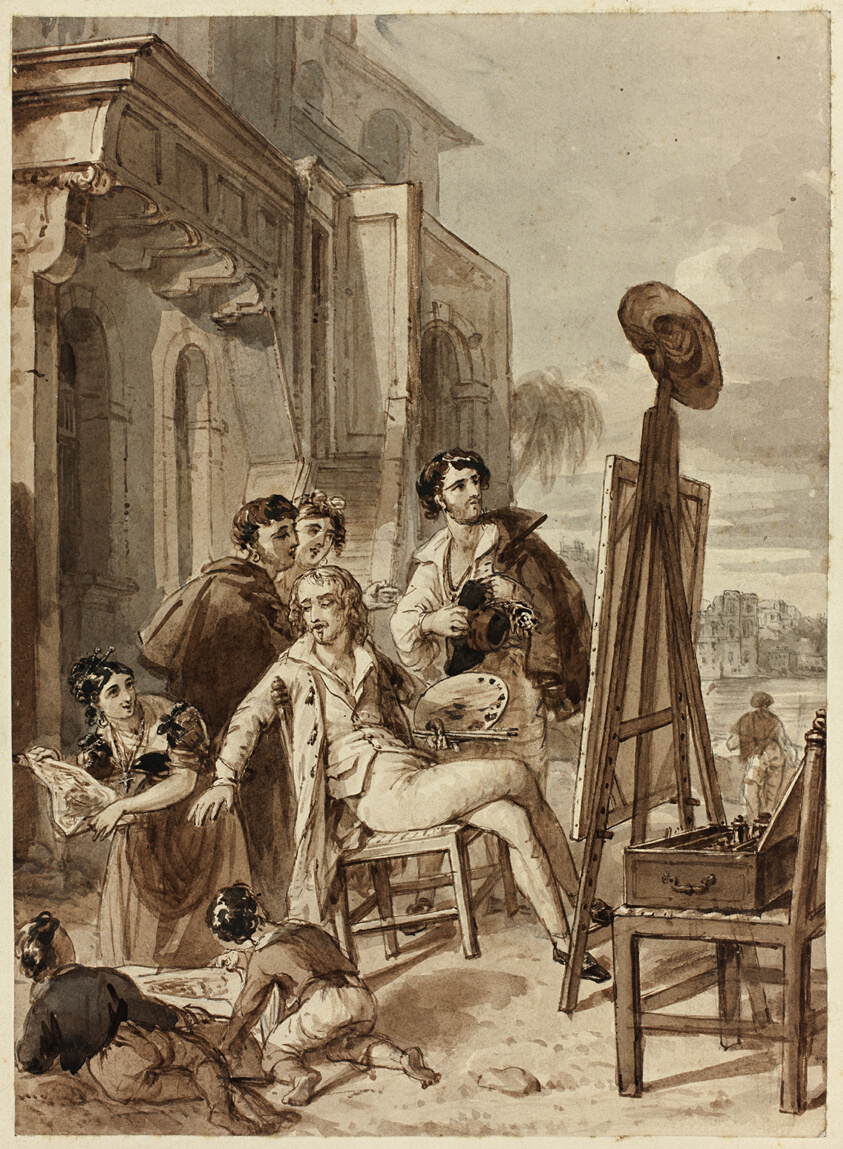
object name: Drawing and Watercolor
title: Artists and Amateurs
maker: John Partridge (English, born Scotland, 1790-1872)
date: February 24, 1832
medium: Brush and brown and gray wash, over graphite, on ivory wove paper, laid down on card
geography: Scotland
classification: ink or chalk wash; drawings (visual works); prints and drawing; brush and wash; paper